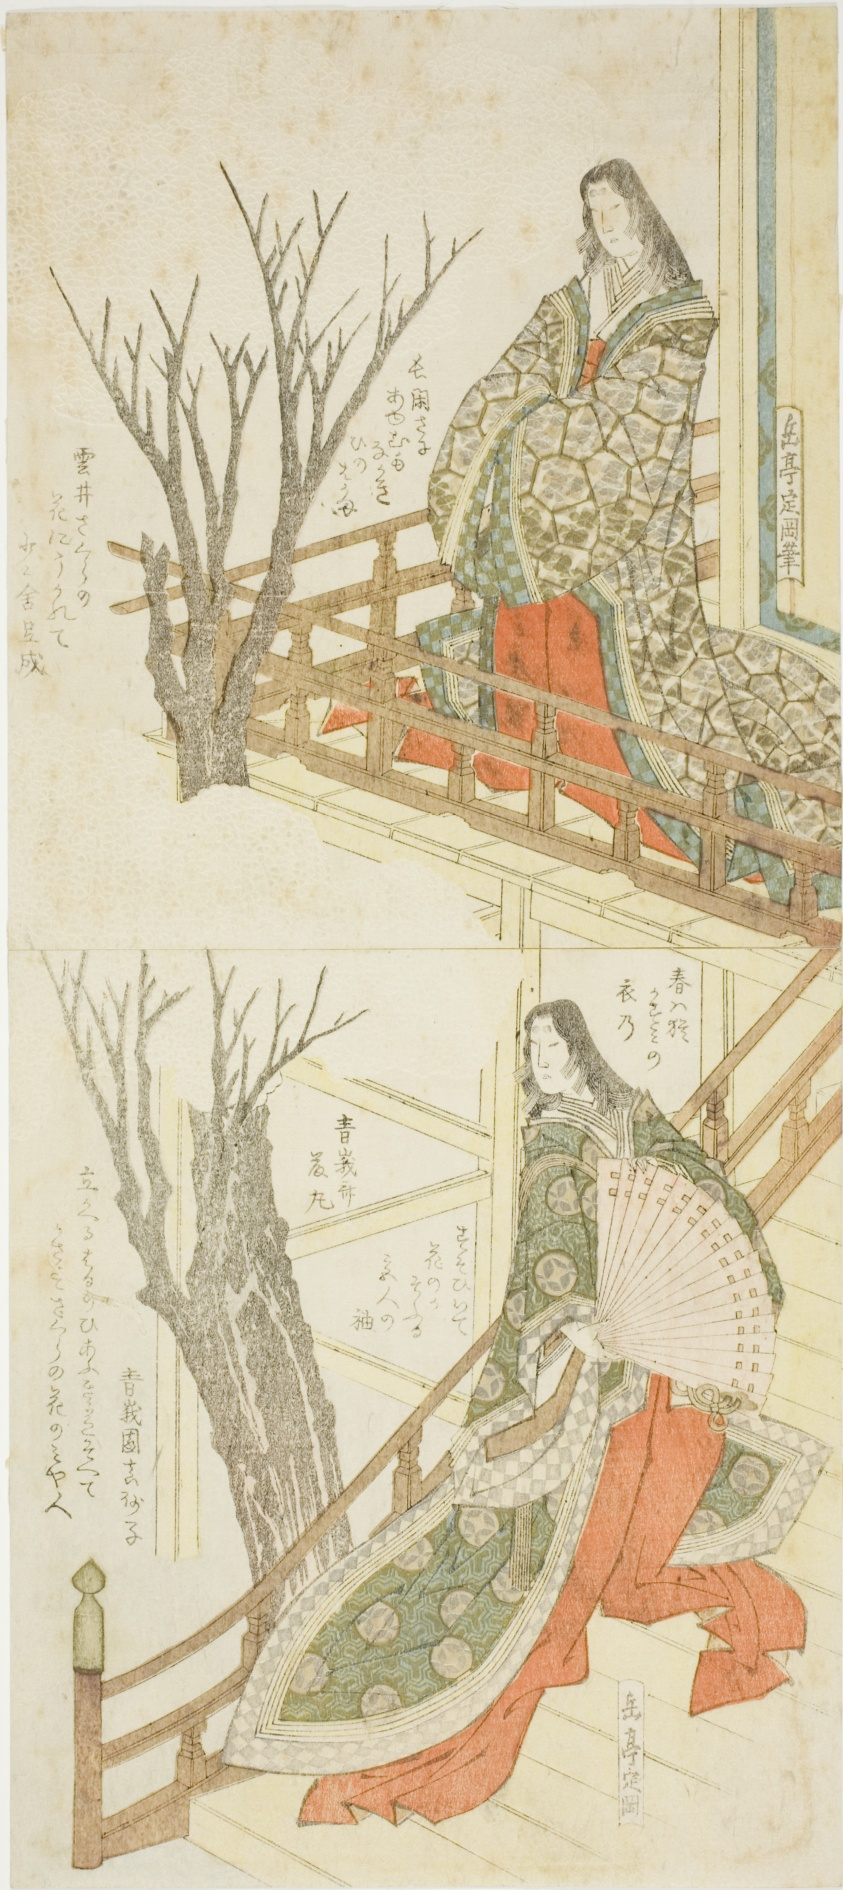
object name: Print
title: Two Court Ladies Admiring Cherry Blossoms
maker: Yashima Gakutei (Japanese, 1786 (?)-1868)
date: 19th century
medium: Color woodblock print; surimono, vertical shikishiban diptych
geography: Japan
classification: woodblock print; print; asian art